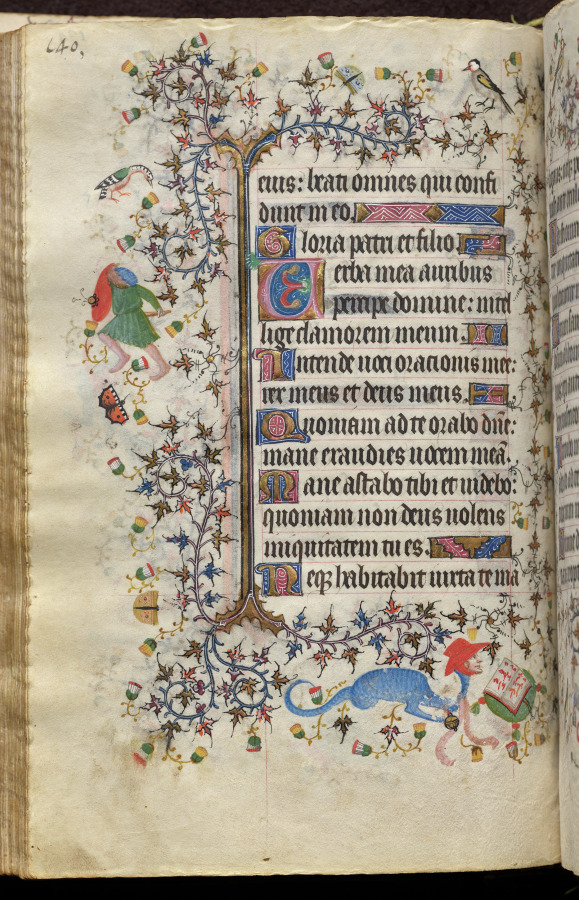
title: Hours of Charles the Noble, King of Navarre (1361-1425): fol. 70v, Text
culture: France, Paris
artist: Master of the Brussels Initials and Associates (French)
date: c. 1405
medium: ink, tempera, and gold on vellum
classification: Bound Volume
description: This precious volume was obviously highly prized by its owner, the French-born King of Navarre, who had his coat of arms painted on no less than twenty folios. Rather than directly commissioning this manuscript from a specific workshop, it seems that Charles the Noble acquired his book of hours -- perhaps ready-made for the luxury market -- while on a trip to Paris in 1404-05. A collaborative effort, six painting styles are evidenced within the pages of this codex, those of two Italians, two Frenchmen, and two Netherlanders. The painter who was responsible for the planning and decoration of the book, and who produced seventeen of the large miniatures, was a Bolognese artist known as the Master of the Brussels Initials. His principal assistant, responsible for most of the borders, was a Florentine who signed his name "Zecho" da Firenze on folio 208 verso.